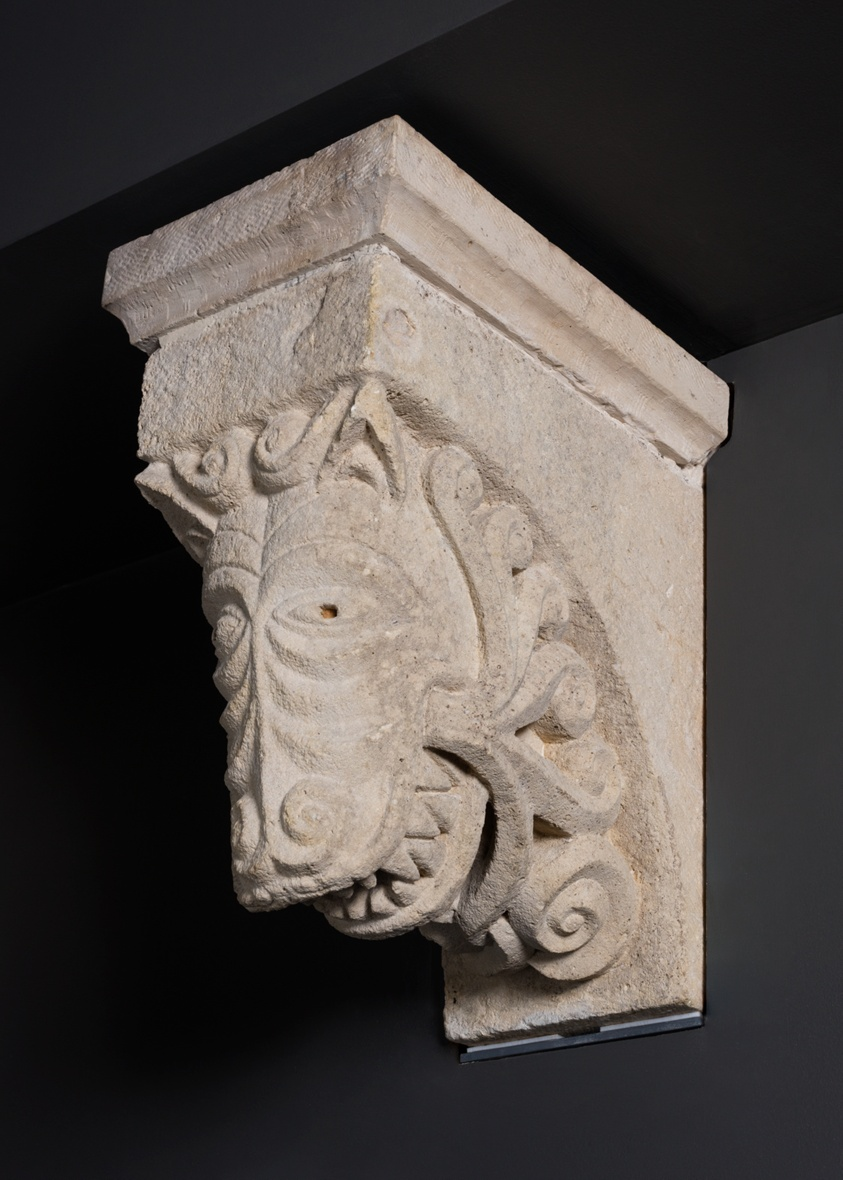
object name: Sculpture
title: Corbel with Animal Mask Sprouting Leaves from the Monastery Church of Notre-Dame-de-la-Grande-Sauve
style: medieval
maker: French; Aquitaine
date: 1150/1200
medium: Limestone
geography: France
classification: sculpture; architectural detail; architectural fragment; architecture; fragment; france; french; limestone; sculpture/stone; stone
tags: corbel, animals, architechture, architectural, architectural detail, architectural fragment, architectural fragments, architecture, architecture, masks